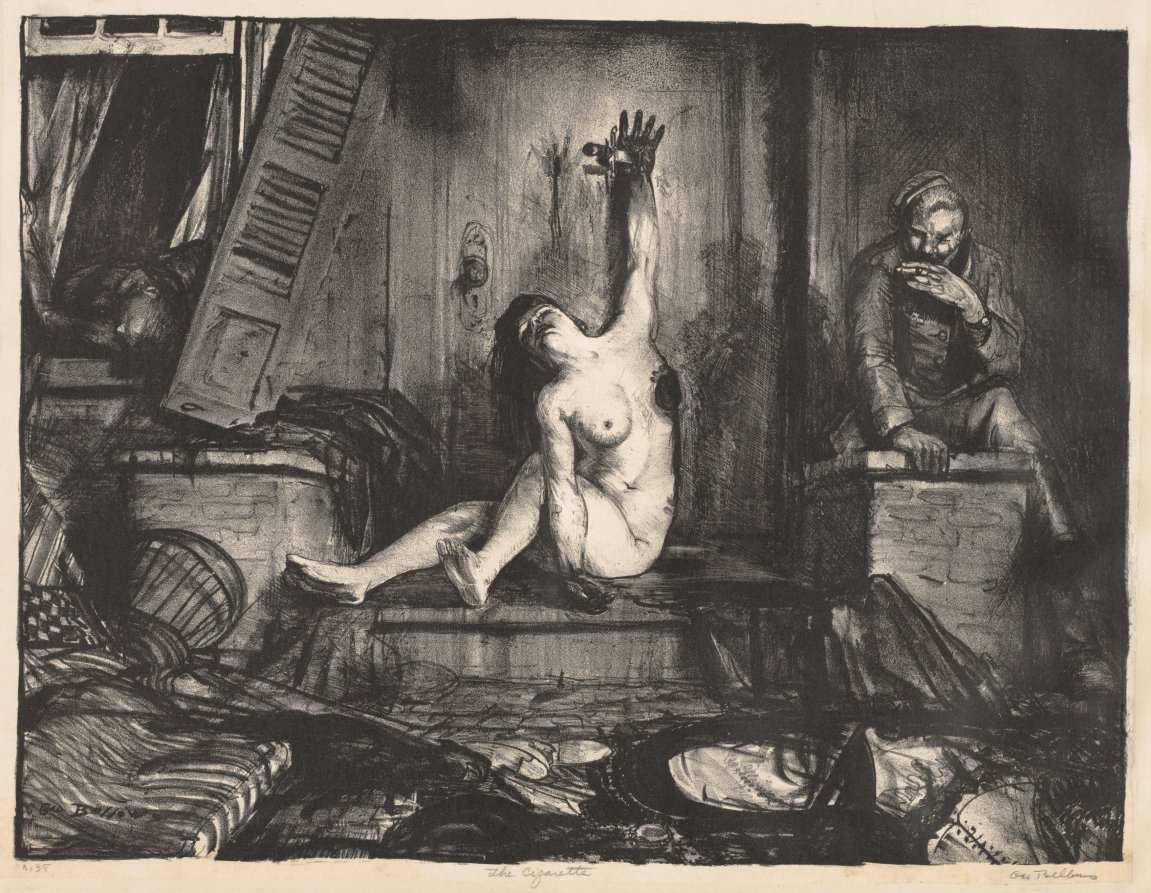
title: War Series: The Cigarette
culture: America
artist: George Bellows (American, 1882–1925)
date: 1918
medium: lithograph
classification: Print